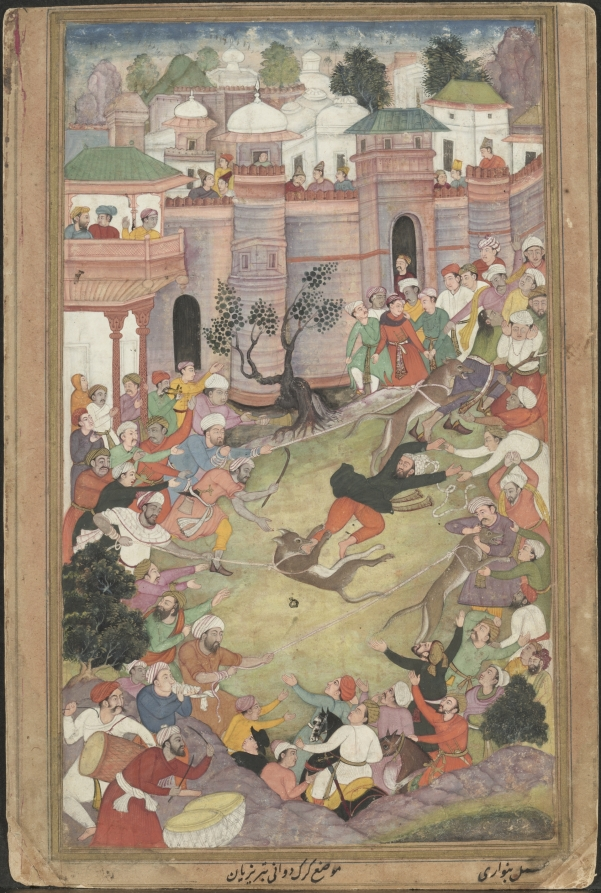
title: The game of wolf-running in Tabriz, from an Akbar-nama (Book of Akbar)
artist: Banavari 1 (Indian, active 1550s-1590s)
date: c. 1595–1600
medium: Gum tempera, ink, and gold on paper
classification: Painting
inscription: signed by Banwari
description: After four years of traveling in exile, fleeing Afghan forces, Humayun reached Tabriz, the glittering capital of the Safavid dynasty in northwestern Iran, here imaginatively rendered by the Indian artist. There the second Mughal emperor enjoyed warm hospitality extended by the shah of Iran, who called for a game of wolf-running for which the city was famous. Artists painting during the time of Akbar, late in his reign when historical subjects dominated, speculated as to how the game was played, based on eyewitness accounts. They gave the figures lively emotive expressions and gestures, and the dense crowding successfully conveys the pandemonium of the scene.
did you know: During extreme activities, turbans could come unwound and fall off.